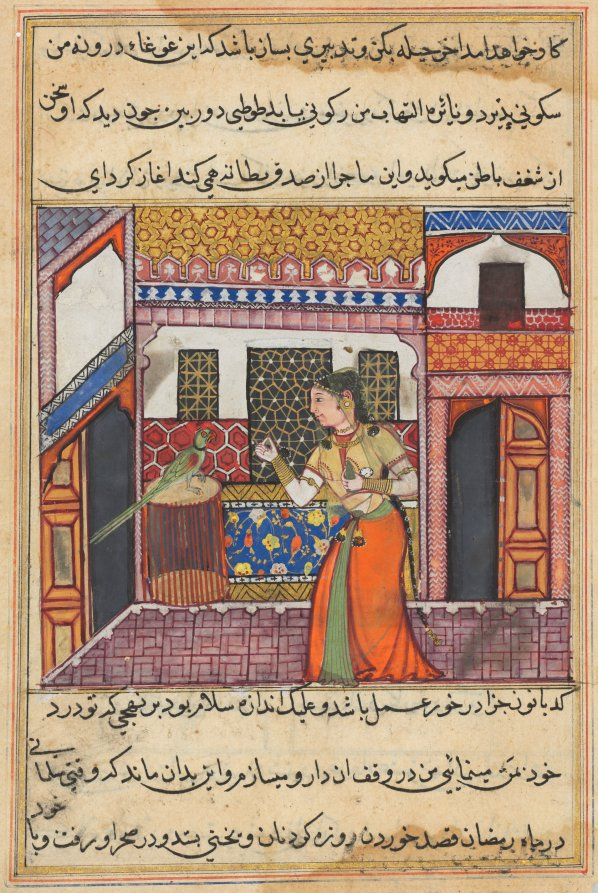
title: The parrot addresses Khujasta at the beginning of the forty-third night, from a Tuti-nama (Tales of a Parrot)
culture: Mughal India, court of Akbar (reigned 1556–1605)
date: c. 1560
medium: gum tempera, ink, and gold on paper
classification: Painting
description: In this brightly patterned scene, Khujasta prepares to leave for a clandestine rendezvous. However, she is stopped by Tuti the parrot, who tells her moralizing stories that last until sunrise. Multiple architectural spaces have been flattened as though they were made using paper cutouts. Khujasta stands on the pink tiled floor of a courtyard. Behind her the blue carpet on the floor of a covered porch has been tilted up vertically below the red tiled lower wall decor. Lattice windows reveal the darkness of night. The golden tile patterns above the protrusions of the pink stone roof appear to indicate the floor of the roof above.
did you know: Khujasta holds a packet of paan for freshening the breath in her left hand.